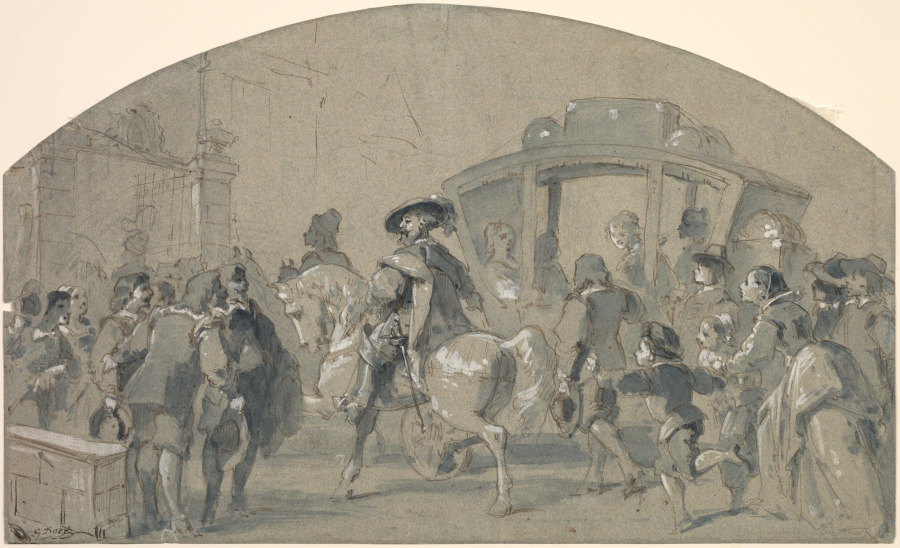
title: Street Scene (recto); Sketches (verso)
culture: France, 19th century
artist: Gustave Doré (French, 1832–1883)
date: c. 1848–49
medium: pen and brown ink and gray wash with white (recto); graphite (verso)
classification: Drawing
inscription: Signed in black ink, lower left: G. Dore; verso, slight graphic sketch of a woman's head; verso, inscribed in graphite, lower center: Charles Aug. Victor/Doerr 1815-1894/In another hand, in graphite: Ch. V. Doerr/eleve de Cogniet/1821-1880